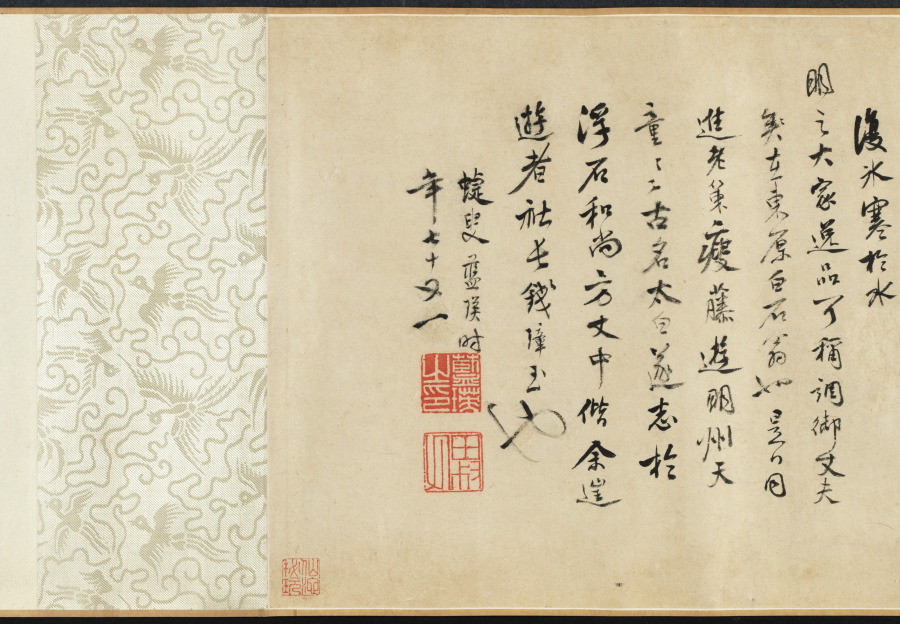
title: Mt. Taibo in the Style of Wang Meng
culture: China, Ming dynasty (1368–1644)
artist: Du Qiong (Chinese, 1396–1474)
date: 1442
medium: handscroll; ink and light color on paper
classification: Painting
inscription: Artist's inscription, signature, and 11 seals: [1 seal] Tung-yüan chai. Huang-ho-shan-ch'iao [Wang Meng] painted a painted called T'ai-po Mountain. Its brushwork is superior and admirable, which is very close to Yu-ch'en [Wang Wei, 699-759]. The cleverness of its composition, the maple groves and rustic temples, the inaccessible ravines and autumnal plateaus, the periolous peaks and strange rocks, etc., all seem to be so natural. The paper is only a little over eight feet, but the landscape has the range of a thousand miles. Once you open and note the contents, it is as if one were roaming among the mountain peaks enveloped in mist and clouds, and forgot the dusty world. When I first saw this, I was so mixed with excitement and joy that I could not take my hands off the painting. So I put it on the table, and tried my best to imitate it, forgetting sleeping and eating for about three months before it was completed. Although I do not dare to tread in the footsteps of Huang-ho shan ch'iao, I took great pains to capture his spirit in composition and colors. I do not know whether it would pass the judgment of the experts. On the fifteenth day of the fifth month, the seventh year of the Cheng-t'ung year [1442], inscribed by Tung-yüan, Tu Chiung. [2 seals] Yung-chia; Ching-chieh ming-men. [8 seals on painting] Tung-yüan chai; Ching-chieh ming-men; Yung-chia; Tu Ch'iung yin; Tung-yüan (repeated 5 times). trans. WKH/LYSL 3 colophons and 7 additional seals: 1 colophon and 2 seals of Chou Ting (1401-1487); 1 colophon and 2 seals of Wu K'uan (1435-1504); 1 colophon, dated 1655, and 2 seals of Lan Ying (1585-after 1664).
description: When a Chinese painter "imitated" a painting by a past master, the intention was never to produce an exact copy. Du Qiong, the Ming painter from Suzhou, is a case in point. The painting style of this handscroll is actually closer to that of Huang Gongwang (1269–1354) than to the style of Wang Meng (about 1301–1385). Both masters were active during the previous dynasty and are among the so-called Four Great Masters of the Yuan dynasty (1279–1368). In this painting, the interplay of styles, including Du Qiong's own, contribute to an inner dimension that is more than visual. Mt. Taibo is located in the province of Zhejiang and is known for its scenic beauty. In this scroll, however, it is not depicted literally. The image is an ideal representation of mountains in southeastern China.